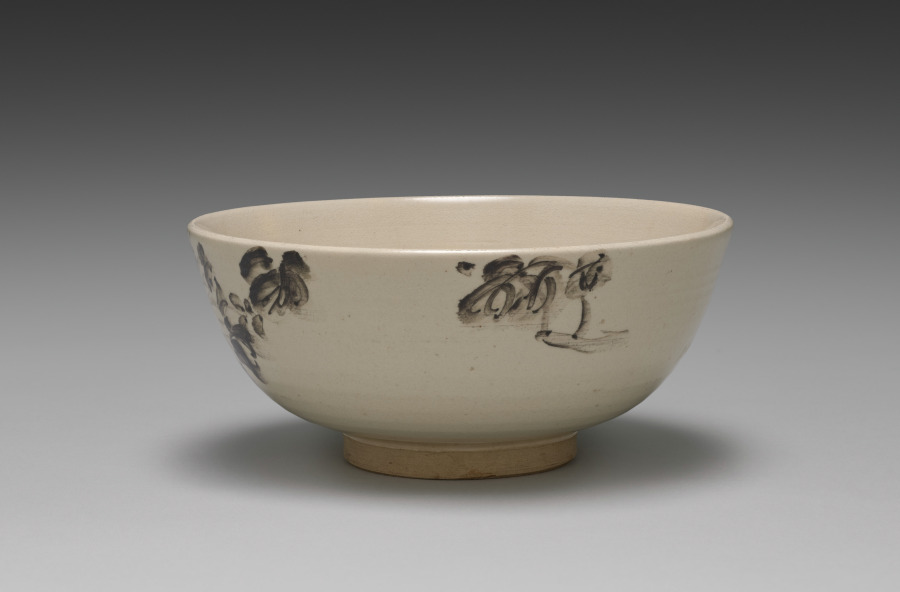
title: Bowl with Chrysanthemums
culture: Japan, Taishō period (1912–26) or Shōwa period (1926–89)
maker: Seifū Yohei IV (Japanese, 1872–1951)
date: 1914–46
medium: Stoneware with underglaze iron oxide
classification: Ceramic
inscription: 清風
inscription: 菊画/ 鉢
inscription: The inside of the box lid has a seal indicating that the bowl was included in a renewal opening of the gallery Manjudo in Tokyo.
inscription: 清風造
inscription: 成山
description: The chrysanthemums in underglaze iron oxide of this bowl of Kyoto ware have a casual feel, which is emphasized by the bowl's shape. When held, the its slightly ridged body would gently massage one’s palms, contributing to the sensory, tactile experience of the piece and possibly generating a sense of comfort and ease. The inside of the box lid has a seal indicating that the bowl was included in a renewal opening of the gallery Manjudo in Tokyo.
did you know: Stoneware works of this type are classified as Kyoto ware, after the city where the style developed.